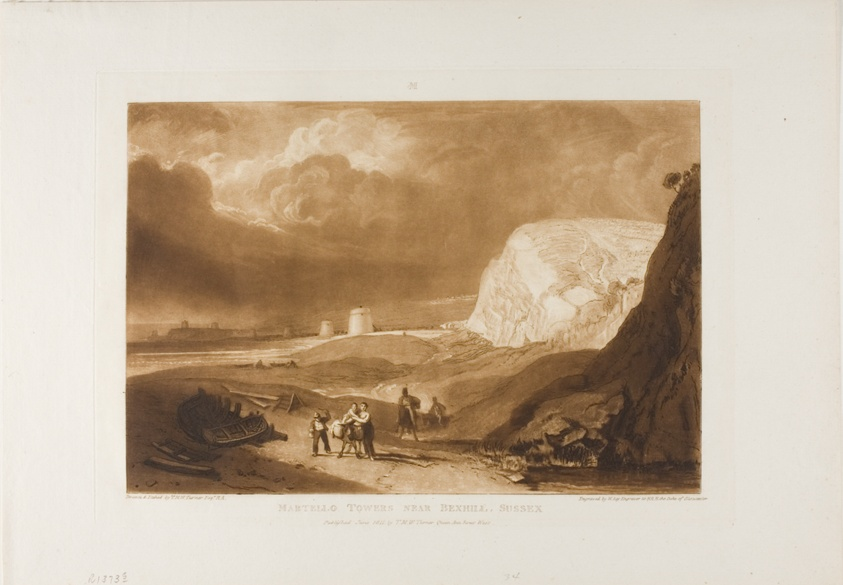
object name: Print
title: Martello Towers near Bexhill, Sussex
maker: Joseph Mallord William Turner (English, 1775-1851); Engraved by William Say (English, 1768-1834)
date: published June 1811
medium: Etching and engraving in brown on ivory laid paper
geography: England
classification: etching; print; prints and drawing